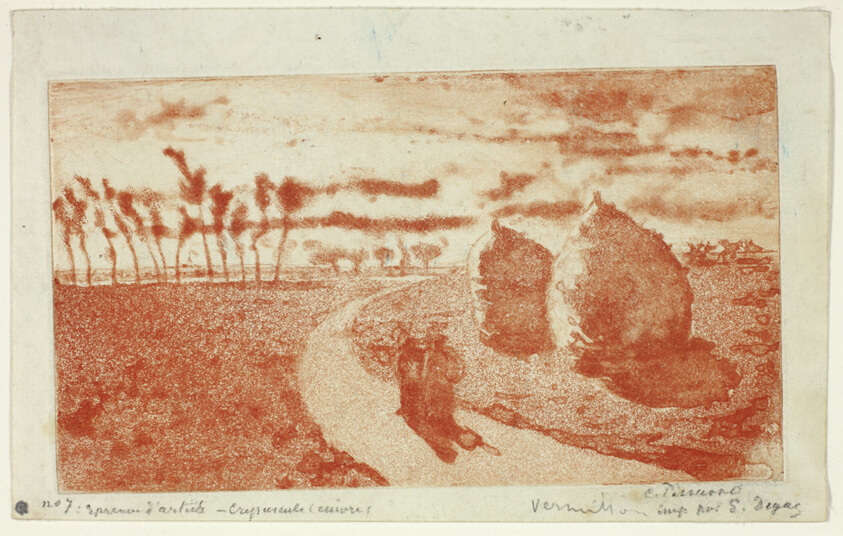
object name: Print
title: Twilight with Haystacks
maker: Camille Pissarro (French, 1830-1903); printed by Edgar Degas (French, 1834-1917)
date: 1879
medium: Aquatint, with etching, in orange-red on ivory wove paper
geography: France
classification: aquatint; print; prints and drawing